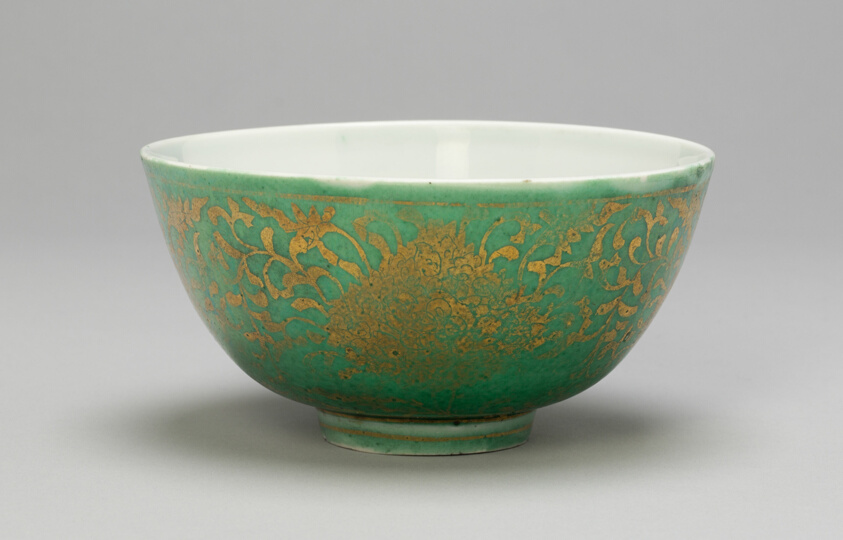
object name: Vessel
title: Cup with Peonies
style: Chinese (culture or style)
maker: China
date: Ming dynasty (1368–1644), Jiajing period (1522–1566)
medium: Porcelain painted in overglaze enamels and gold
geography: China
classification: drinking vessel; porcelain; asian art; ceramics; vessel